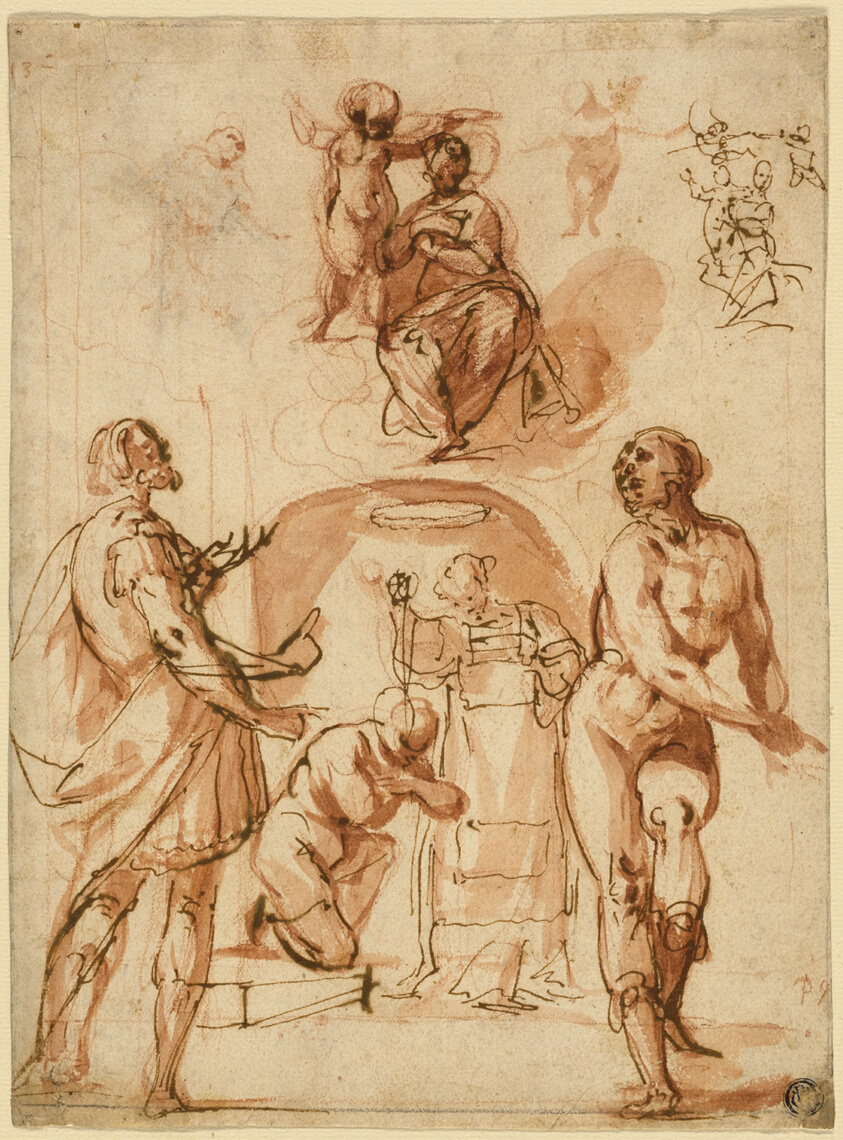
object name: Drawing and Watercolor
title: Sketches: Virgin and Child; Virgin and Child with Two Saints; Saint Baptizing Kneeling Figure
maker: Giovanni Baglione (Italian, 1573-c.1644)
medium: Pen and brown ink, with brush and red chalk wash, over red chalk, on ivory laid paper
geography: Italy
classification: ink or chalk wash; drawings (visual works); prints and drawing